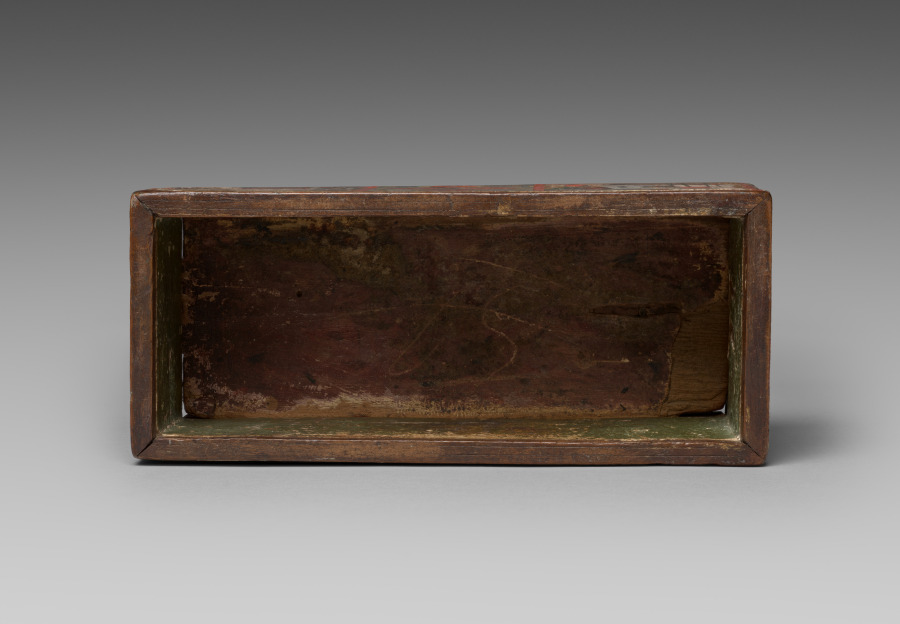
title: Reliquary Box with Scenes from the Life of John the Baptist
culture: Byzantium, Constantinople, late Byzantine period, 14th century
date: 1300s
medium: tempera and gold on wood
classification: Wood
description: John the Baptist--the first person to recognize Christ as the promised savior and the one who baptized him in the Jordan River--was one of the Byzantine Empire’s most revered saints. This box shows four scenes from the saint’s life: John’s martyrdom, Christ’s baptism, John’s birth, and the announcement of his birth to his parents. It probably once housed one of the saint’s relics; several were kept in churches and monasteries in Constantinople, including fragments of his skull and right arm and locks of his blood-clotted hair.